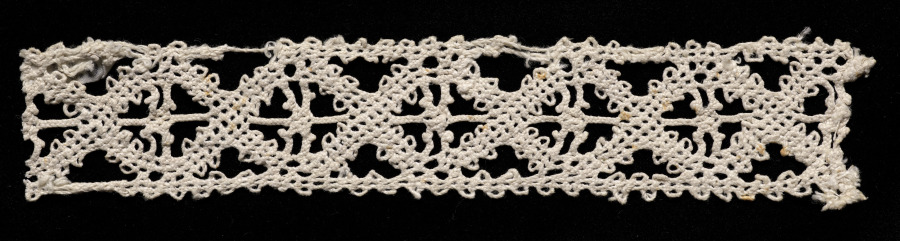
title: Lace Insertion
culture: Italy, Venice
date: 1540–60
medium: Bobbin lace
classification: Lace